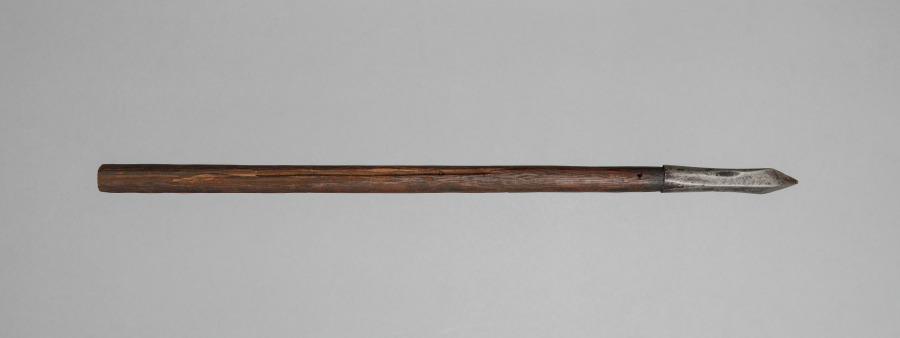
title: Crossbow Bolt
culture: Germany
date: 1500s-1600s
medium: wood, leather, steel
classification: Arms and Armor